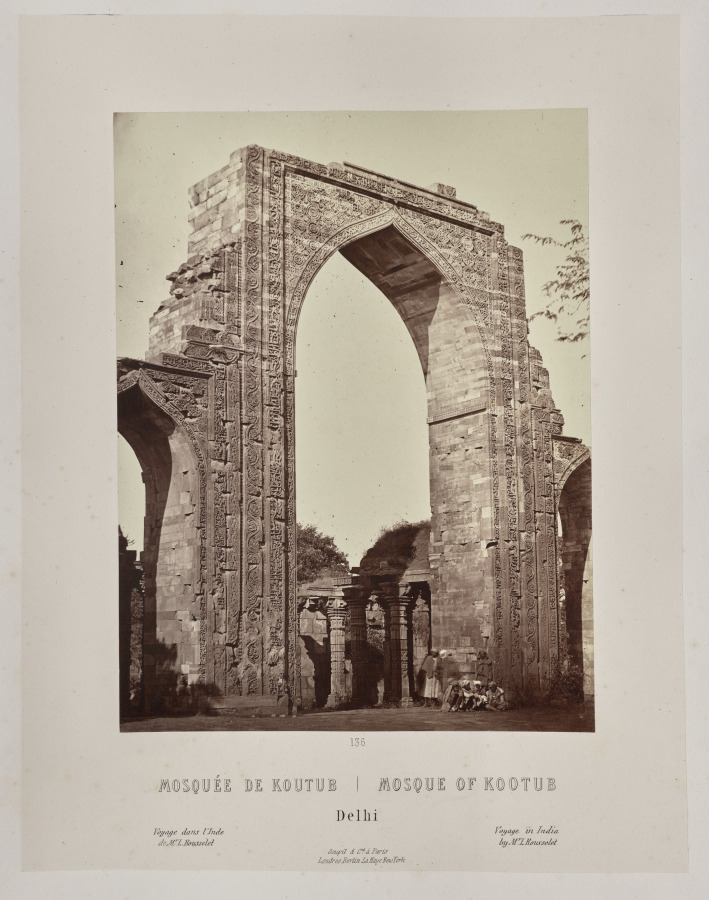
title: Mosque of Kootub, Delhi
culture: France, 19th century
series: India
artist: Louis-Théophile Marie Rousselet (French, 1845–1929)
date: 1865–68, published 1869–70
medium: Albumen print from glass plate negative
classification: Photograph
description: Concerned that his drawings did not do justice to the splendor of India’s monuments, Rousselet learned photography in India that year, a remarkable accomplishment. He proved to be a talented photographer with a sophisticated sense of composition. The scenes in this volume sweep across sites of Sultanate, Rajput, and Mughal power in northern India, from the sacred Hindu city of Varanasi on the Ganges River to Alwar in Rajasthan. Also included are several scenes of industry and portraits of Indian rulers.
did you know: Louis Rousselet described himself as a “scientific traveler” when he went to India alone at age 18 in 1863 and stayed into 1868.